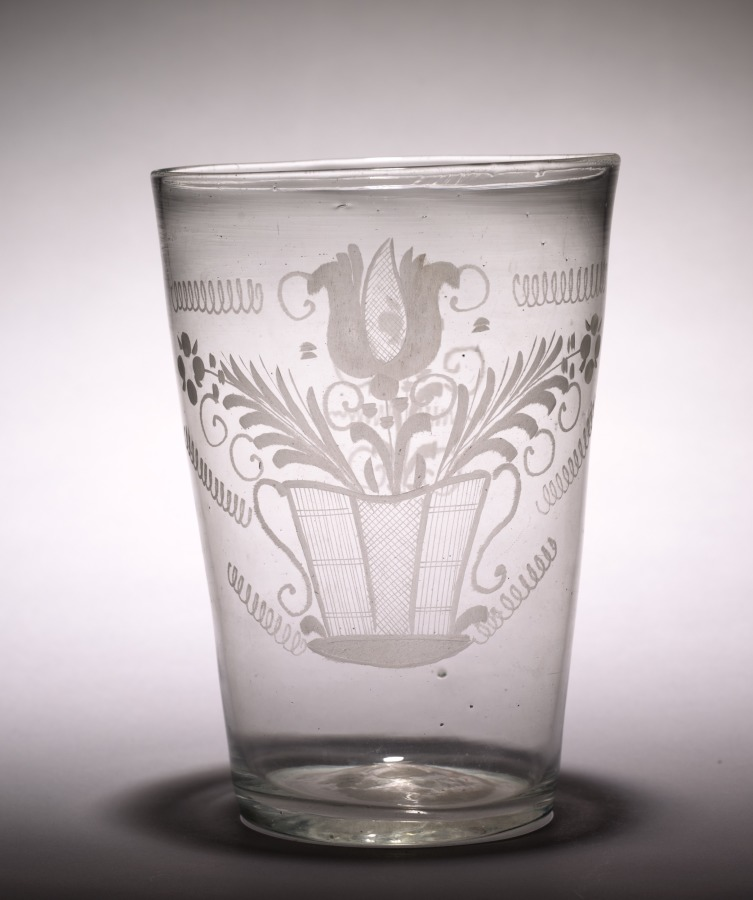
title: Beaker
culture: America, late 18th century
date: late 1700s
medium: glass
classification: Glass